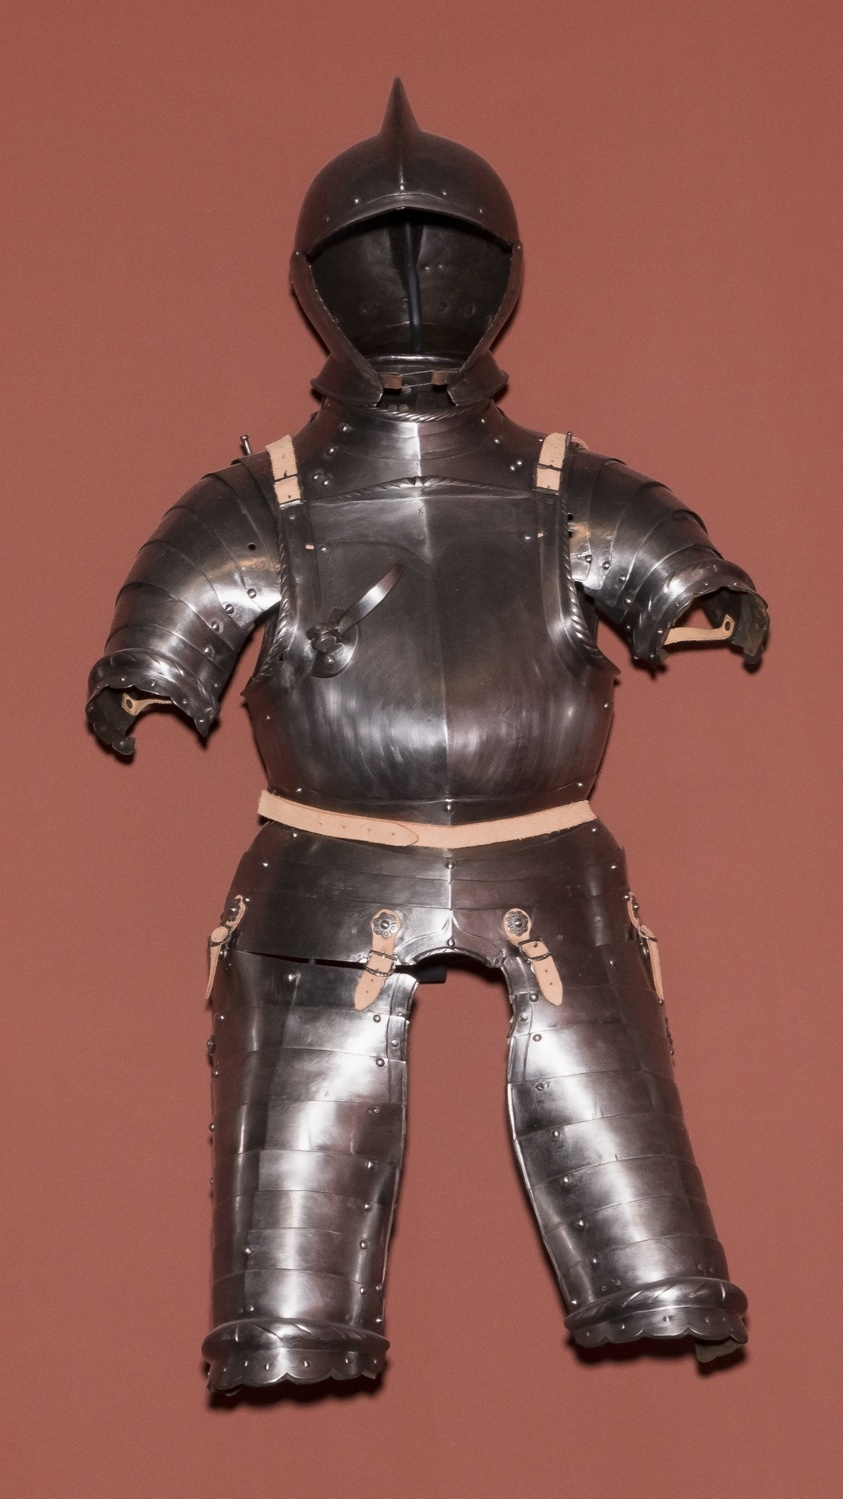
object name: Armor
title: Infantry or Demi Lancer's Armor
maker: South German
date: 1540-50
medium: Steel and leather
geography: Germany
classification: suit-element; armor; arms and armor